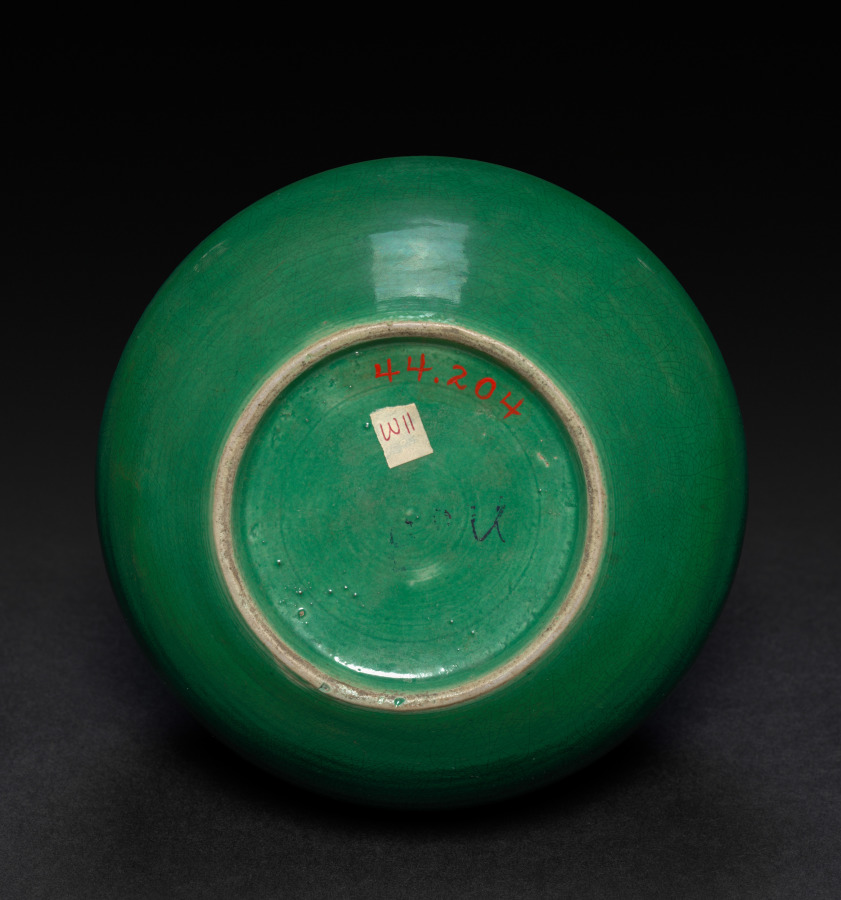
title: Bottle-shaped Vase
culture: China, Qing dynasty (1644–1911), Qianlong reign (1736–95)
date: 1736–95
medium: porcelain with green glaze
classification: Ceramic